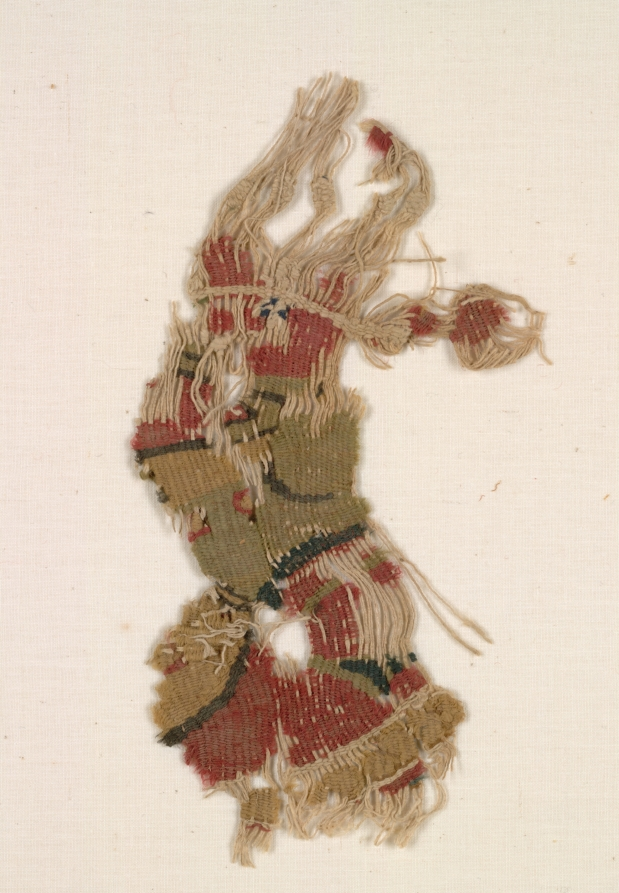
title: Two Fragments with Indistinguishable Design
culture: Egypt ?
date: before 1968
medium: Linen and wool: tapestry weave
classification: Textile